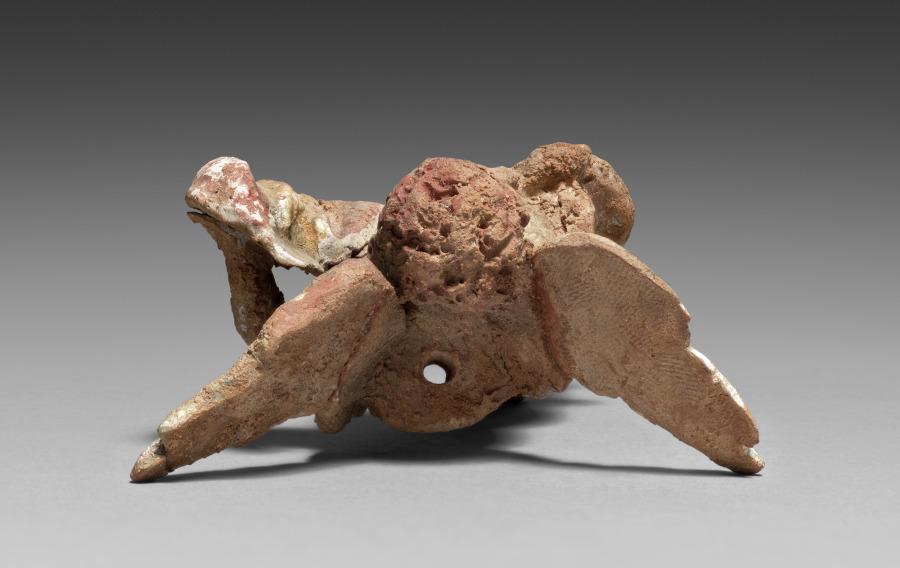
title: Figurine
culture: Greece, Myrina, Hellenistic period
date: 300–100 BCE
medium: terracotta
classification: Sculpture